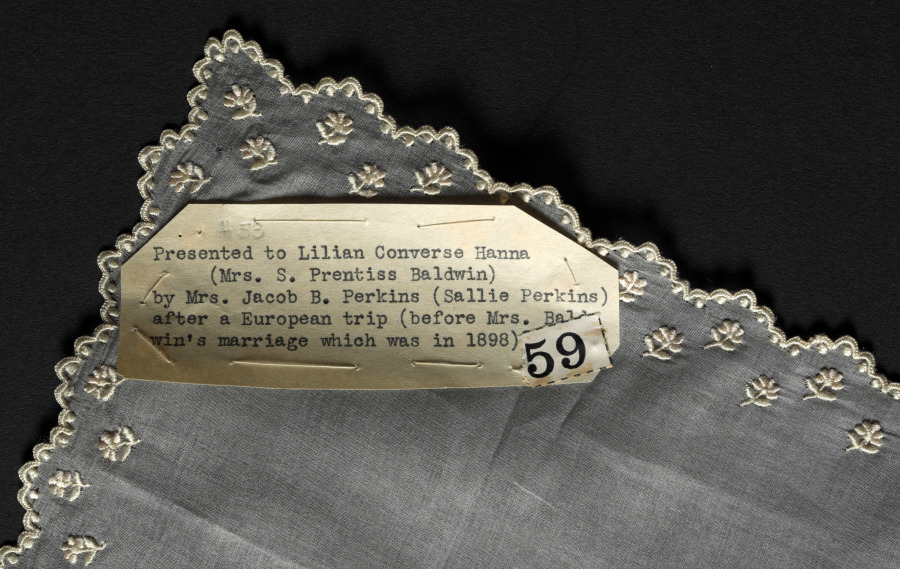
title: Embroidered Handkerchief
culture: Philippines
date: 1880–99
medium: Plain weave piña, silk embroidery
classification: Embroidery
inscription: monogram "L.C.H." in one corner.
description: This square handkerchief is made of piña fiber cloth in plain weave. All four edges are finished with a hand-embroidered cotton border of small repeating floral motifs. One corner bears the embroidered monogram “L. C. H.,” the initials of its first owner, Lilian Converse Hanna.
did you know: Sallie Perkins (Mrs. Jacob B. Perkins) gifted this handkerchief to Lilian Converse Hanna (Mrs. S. Prentiss Baldwin) before the latter’s marriage in 1898.